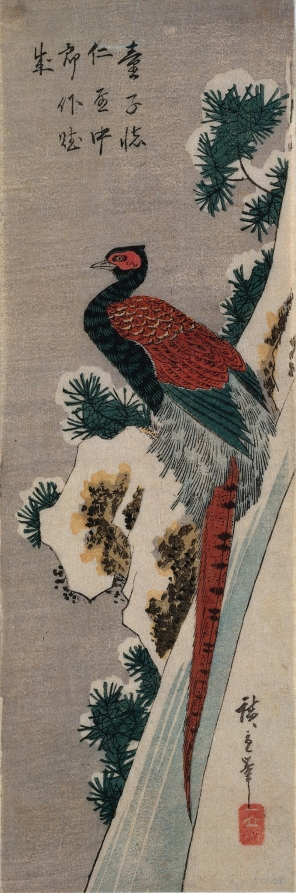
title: Copper Pheasant by Snowy Waterfall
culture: Japan, Edo period (1615–1868)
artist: Utagawa Hiroshige (Japanese, 1797–1858)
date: late 1830s or early 1840s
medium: color woodblock print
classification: Print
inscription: Signature: Hiroshige hitsu Artist Seal: Ichiryusai